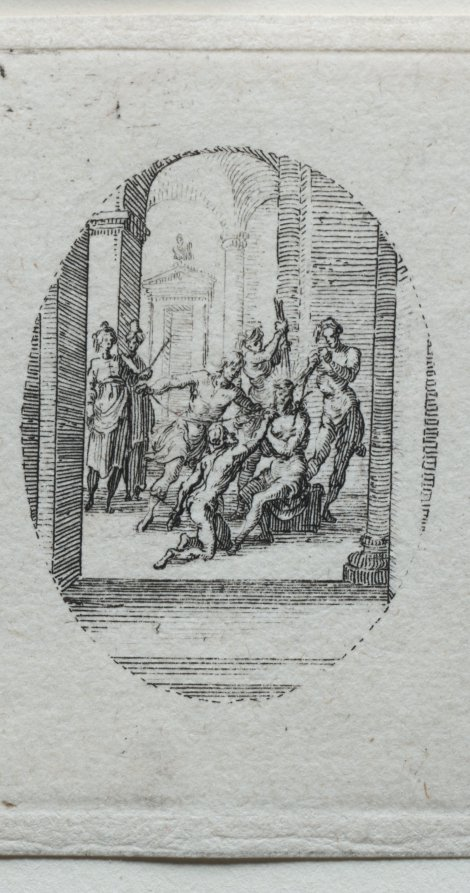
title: The Mysteries of the Passion: Christ Crowned with Thorns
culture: France, 17th century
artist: Jacques Callot (French, 1592–1635)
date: 1631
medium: etching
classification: Print